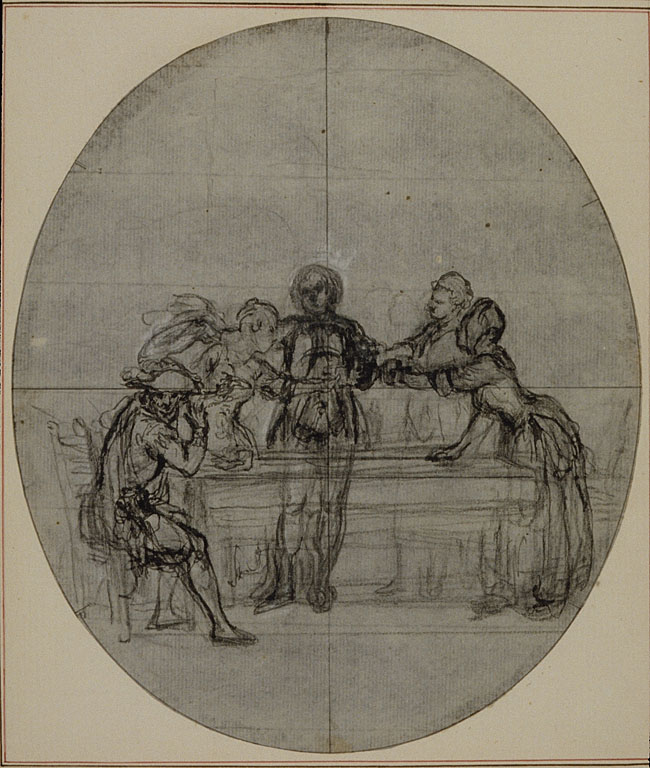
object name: Drawing and Watercolor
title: Study for a second edition, never published, of Colle's "La Partie de Chasse de Henri IV", Act III, Scene 10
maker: Hubert François Gravelot (French, 1699-1773)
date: before 1766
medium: Black chalk, with pen and black ink, heightened with touches of white chalk, on oval-shaped gray laid paper, incised for transfer and perimeter moounted on ivory laid paper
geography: France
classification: pen and ink drawings; drawings (visual works); prints and drawing